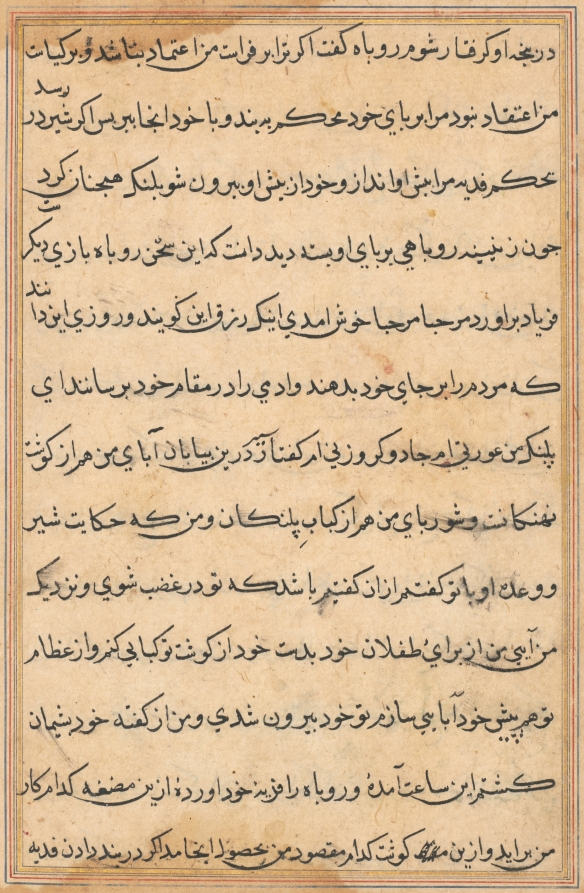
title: Page from Tales of a Parrot (Tuti-nama): text page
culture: Mughal India, court of Akbar (reigned 1556–1605)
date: c. 1560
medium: gum tempera, ink, and gold on paper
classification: Painting